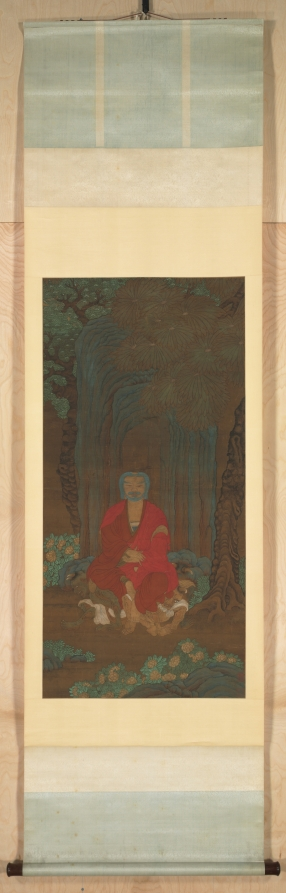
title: Shakyamuni under the Bodhi Tree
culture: China, Ming dynasty (1368–1644)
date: 1600–1650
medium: hanging scroll; ink and color on silk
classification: Painting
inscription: Artist's seal(?): Ta-fang-chih. 1 additional seal of Chiao Ping (dates unknown)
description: The historical Buddha Shakyamuni is seated in meditative posture upon the backs of three demons under the bodhi tree, where he achieved enlightenment. All three demons have horns like devils, and two have green skin. While they accommodate the Buddha, his weight seems to keep them under control. Since the Buddha’s hands do not conform to any accepted gesture, the specific religious event portrayed is unclear.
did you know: The blue-green style and grotesque goblins suggest an otherworldly sphere.